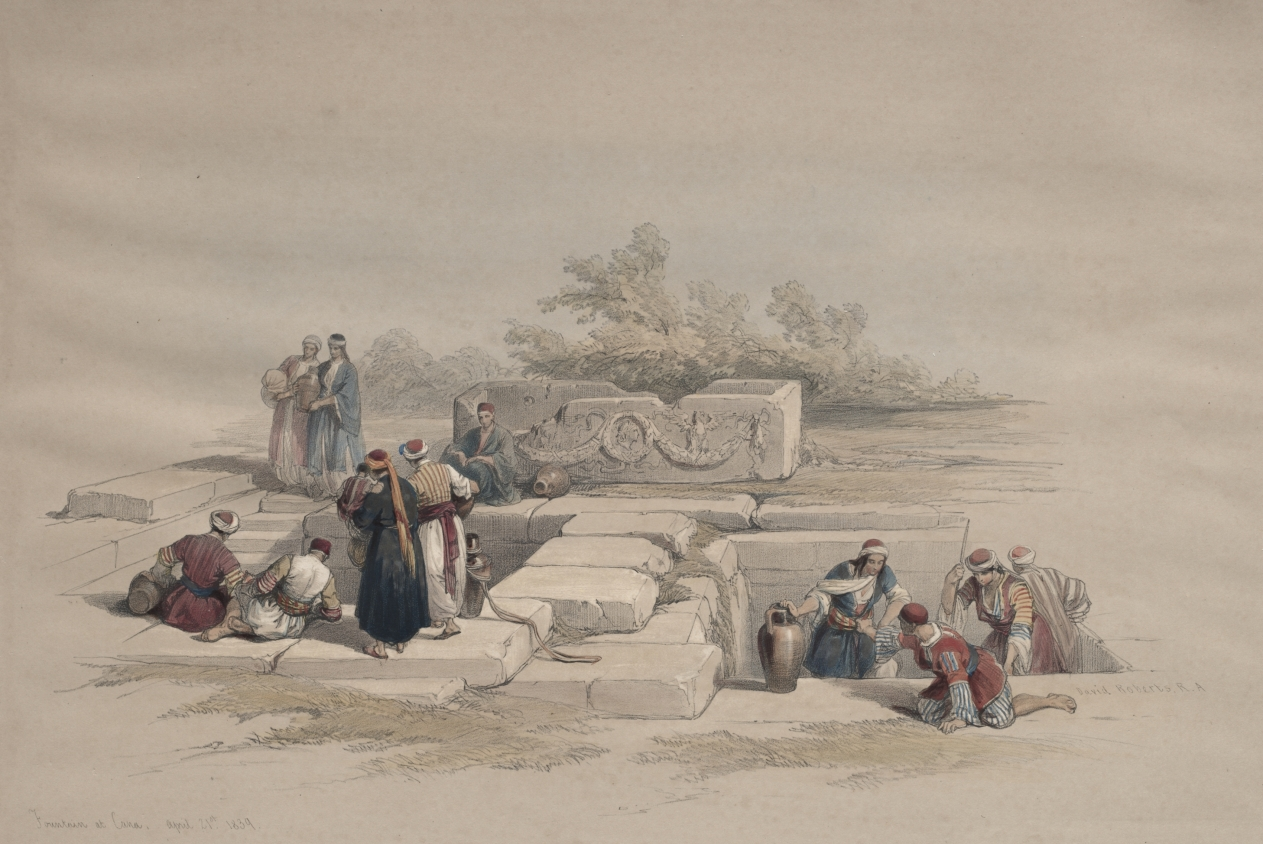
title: Fountain at Cana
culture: England, 19th century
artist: David Roberts (Scottish, 1796–1864)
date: 1839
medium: color lithograph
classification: Print